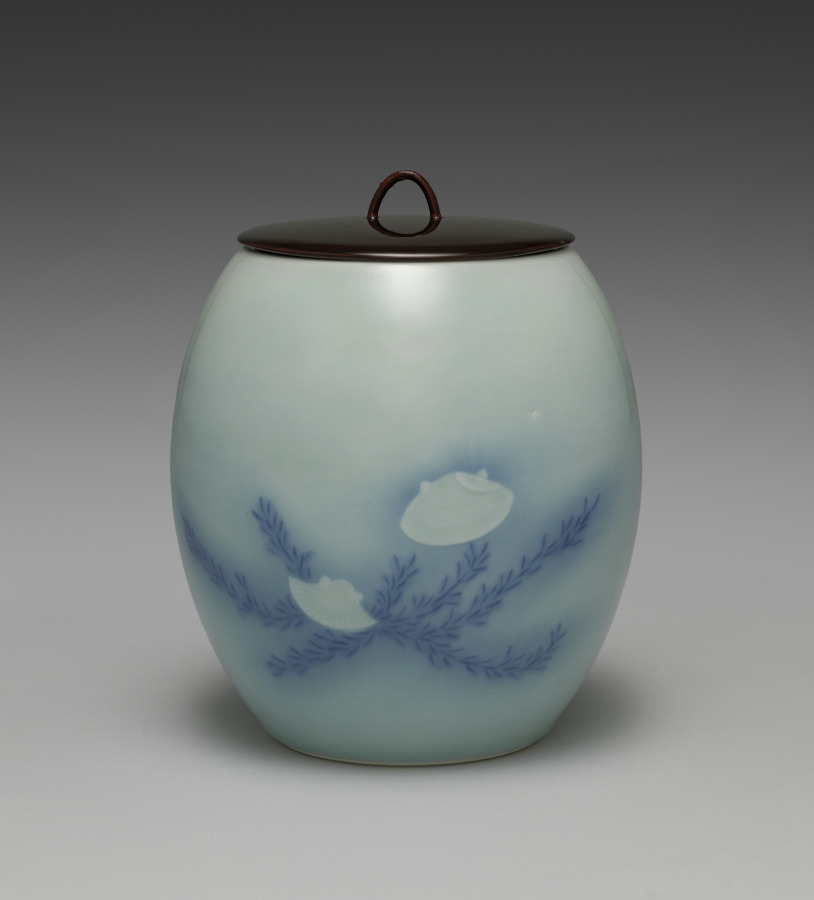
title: Water Container with Shell and Seaweed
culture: Japan, Meiji period (1868–1912) or Taishō period (1912–26)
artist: Seifū Yohei IV (Japanese, 1872–1951)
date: 1914–46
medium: Porcelain with underglaze blue, blue glaze and molded design and lacquered wood lid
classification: Ceramic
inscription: 清風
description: Yohei IV chose an aquatic theme for this mizusashi. He applied clay to the surface and molded the shape of a large conch on one side and, on the other, a clam and a scallop. The finer details he incised into the surface of his low-relief shapes. He then painted seaweed as though it were coming out from behind the sea creatures, and he further set off the animals using a masking technique with a gradated blue surround. Finally, he applied a translucent blue glaze, identified on the box as mizusai, over the entire body of the vessel. The resulting effect is that one imagines having descended through the water to the ocean floor.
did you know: A mizusashi, water container, is an essential utensil for a tea ceremony.